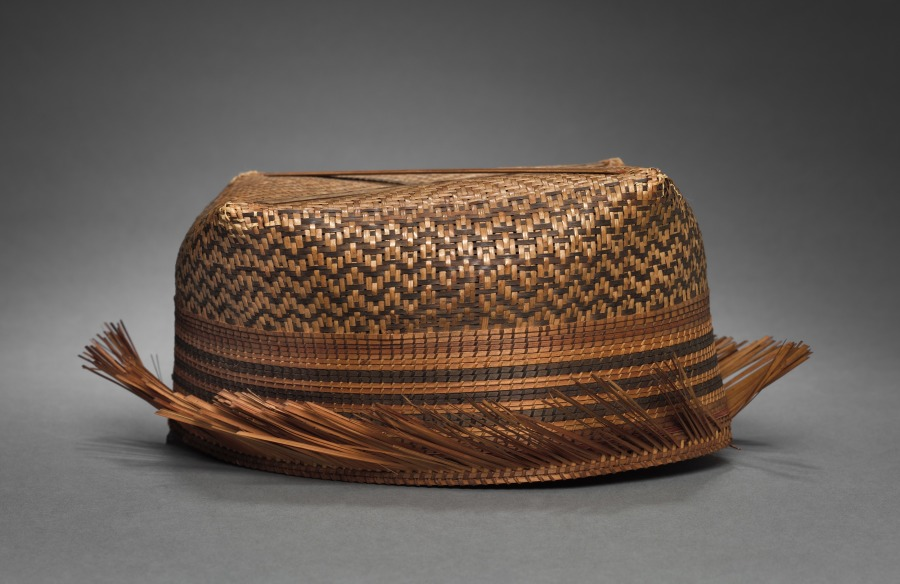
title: Hat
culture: Africa, Central Africa, Democratic Republic of the Congo, Mangbetu-style maker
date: before 1929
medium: Plant fibers and dye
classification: Garment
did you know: This woven hat looks brand new because it was one of the many items the business-savvy chief of Ekibondo had artists and artisans make for the foreigners who passed through his village.